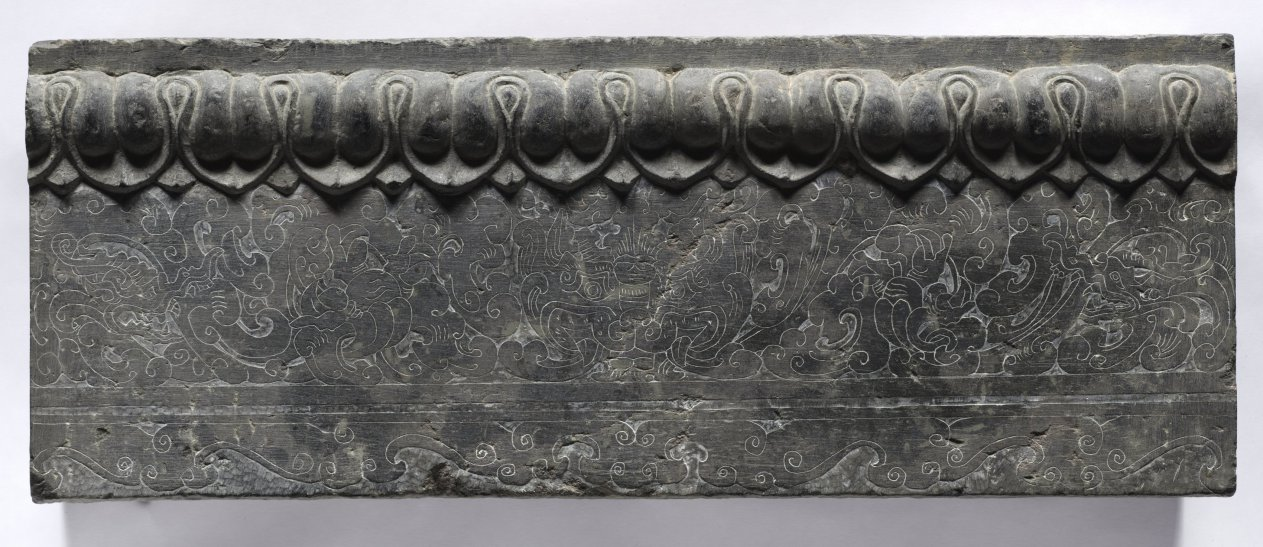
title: Section of a Coffin Platform: Horizontal Panel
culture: China, Northern Qi dynasty (550-577)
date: 550–577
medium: limestone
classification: Sculpture